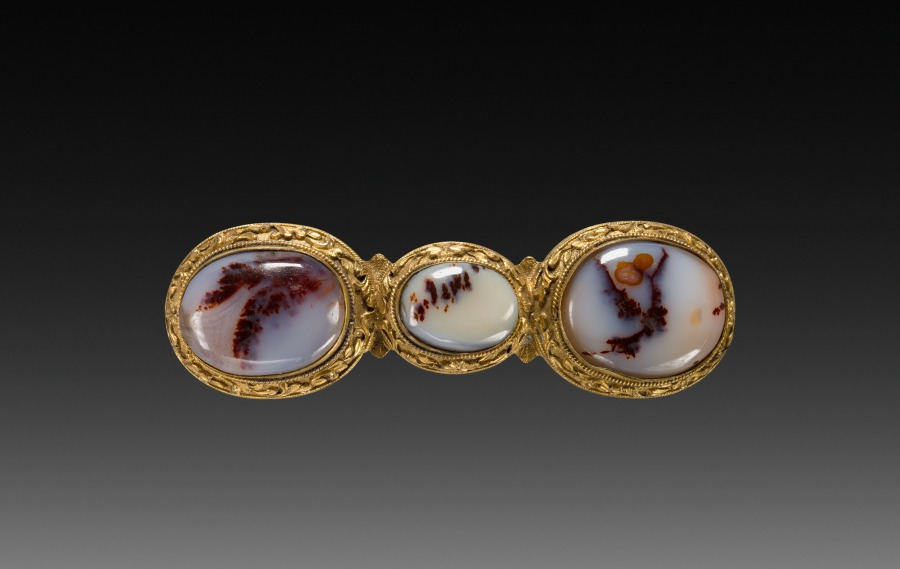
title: Buckle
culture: China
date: 1900s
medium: brass or bronze gilt, engraved and set with three onxy stones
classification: Jewelry